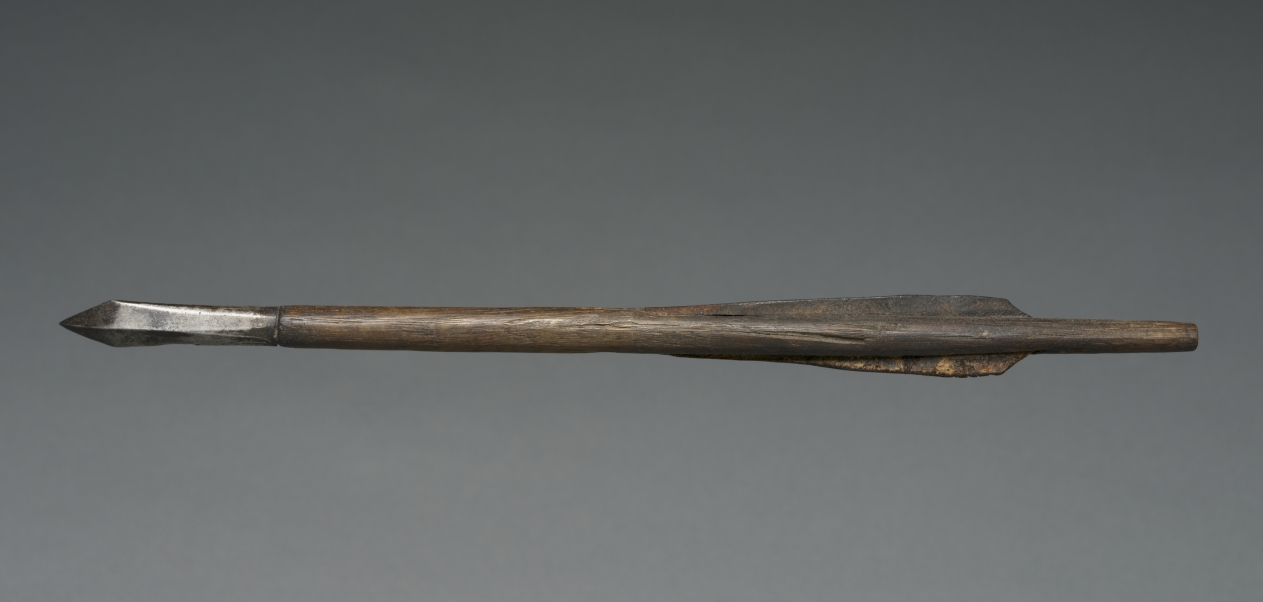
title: Crossbow Bolt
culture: Germany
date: 1500s–1600s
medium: wood, leather, steel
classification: Arms and Armor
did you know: Bolts with leather feathering were used mainly in the Tyrolean area, which includes northern Italy and western Austria.